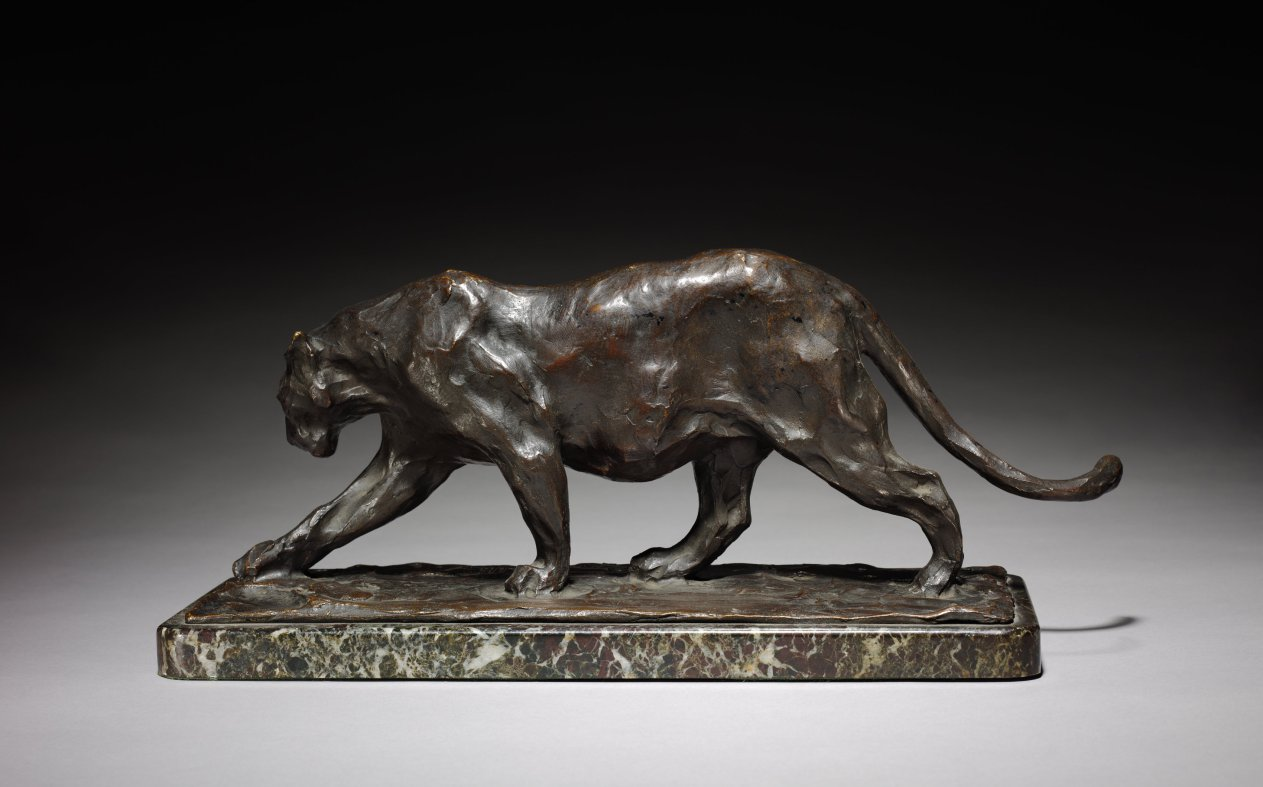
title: Walking Panther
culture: Italy, active in France, early 20th Century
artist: Rembrandt Bugatti (Italian, 1884–1916)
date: 1903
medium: bronze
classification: Sculpture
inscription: signed: R. Bugatti, stamped A. A. Hebrard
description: Panthers were among the first wild animals depicted by Rembrandt Bugatti after his encounter with them in the French national zoo, at the Jardin des Plantes in Paris.